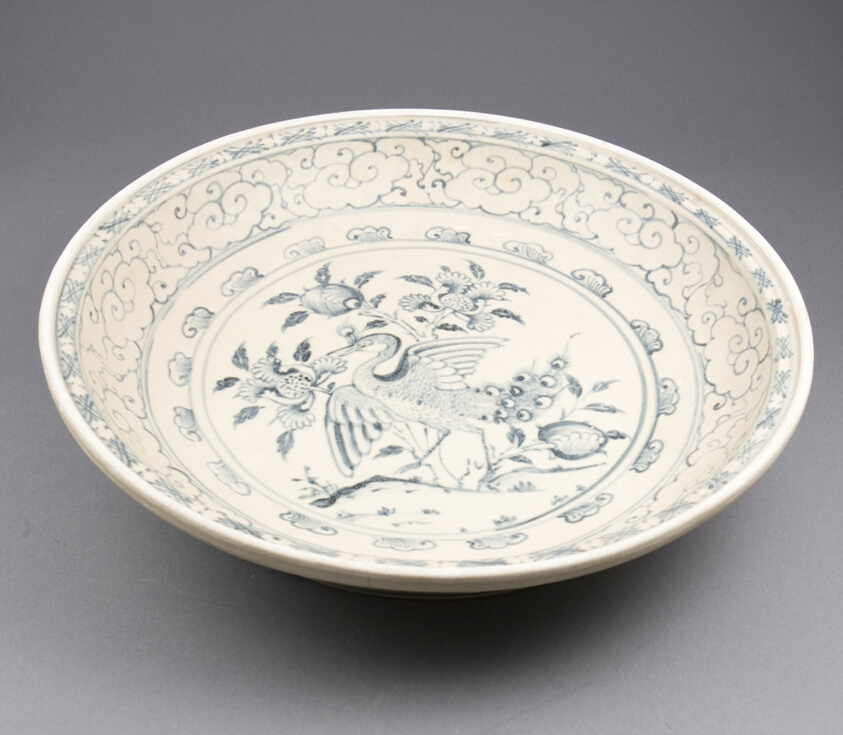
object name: Ceramics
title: Dish with Peacock and Floral Motif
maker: Vietnam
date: 15th century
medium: Glazed stoneware with cobalt-blue underglaze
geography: Vietnam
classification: porcelain; ceramics; asian art